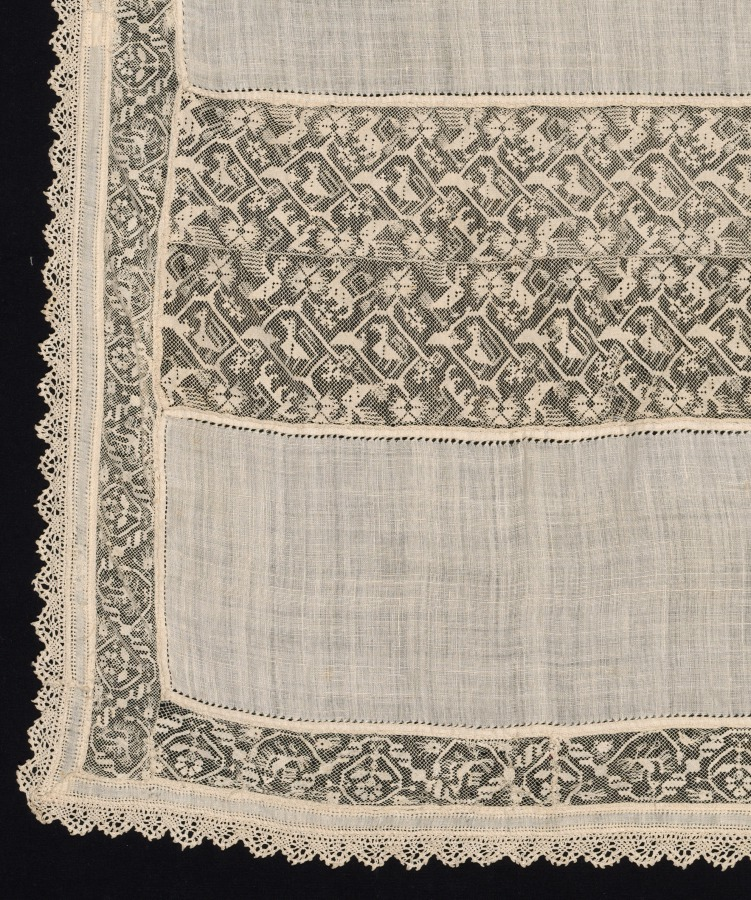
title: Cloth with Winged and Two-Tailed Animals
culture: Italy, 1600s-1700s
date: 1600s-1700s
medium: Bleached plain weave linen (est.): needle lace, filet/lacis (knotted ground and darned in two directions) and bobbin lace edging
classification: Lace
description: Strange two-tailed animals accompanied by birds appear on the filet/lacis lace. The compact pattern repeats horizontally, with inserted bands of two-tailed animals confronting birds. The bird motif is also depicted alongside a flower motif on the outer filet/lacis border.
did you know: This cloth was given to the museum by Louise Tifft Brown, a native Clevelander who became an expert in lace while living in Venice for 35 years.